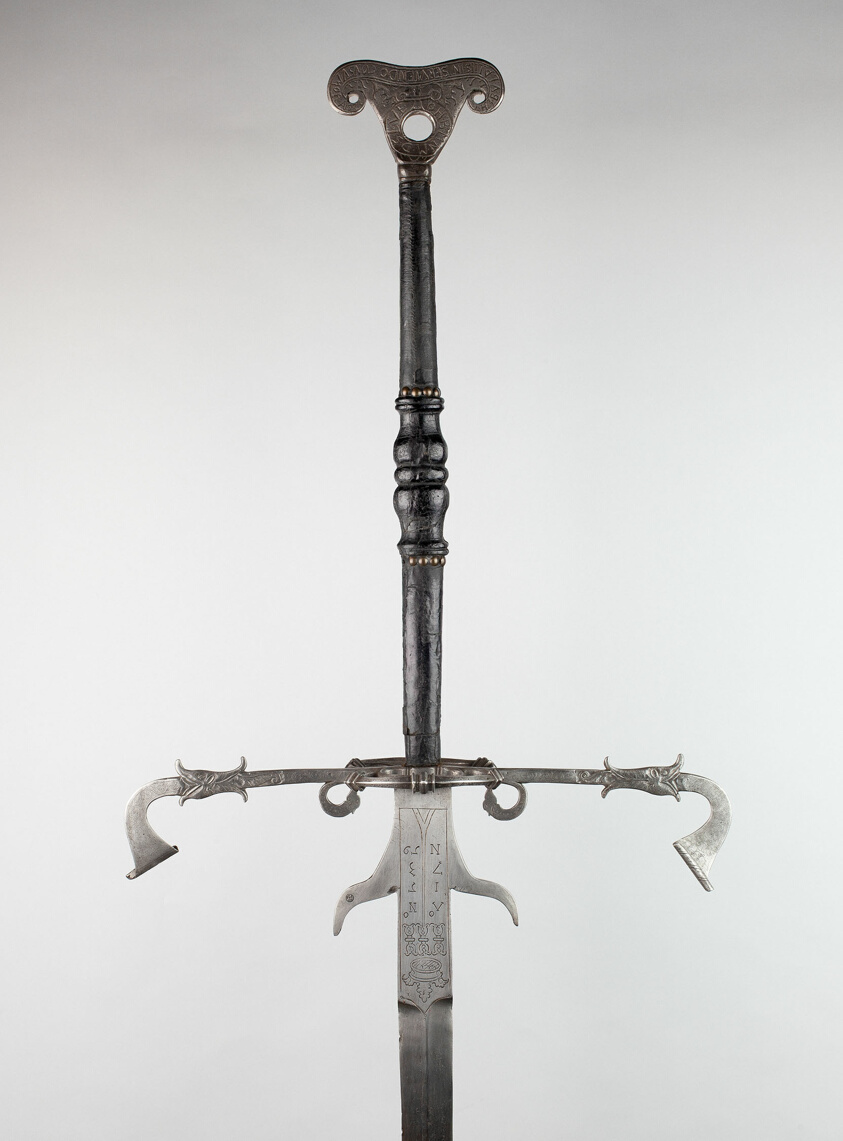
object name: Arms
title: Two-Handed Sword for the Bodyguard of Julius, Duke of Brunswick-Lüneburg and Prince of Wolfenbüttel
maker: Northern German, Brunswick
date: 1573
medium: Iron, steel, brass, wood, and leather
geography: Northern Germany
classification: edged weapon-sword; arms; arms and armor